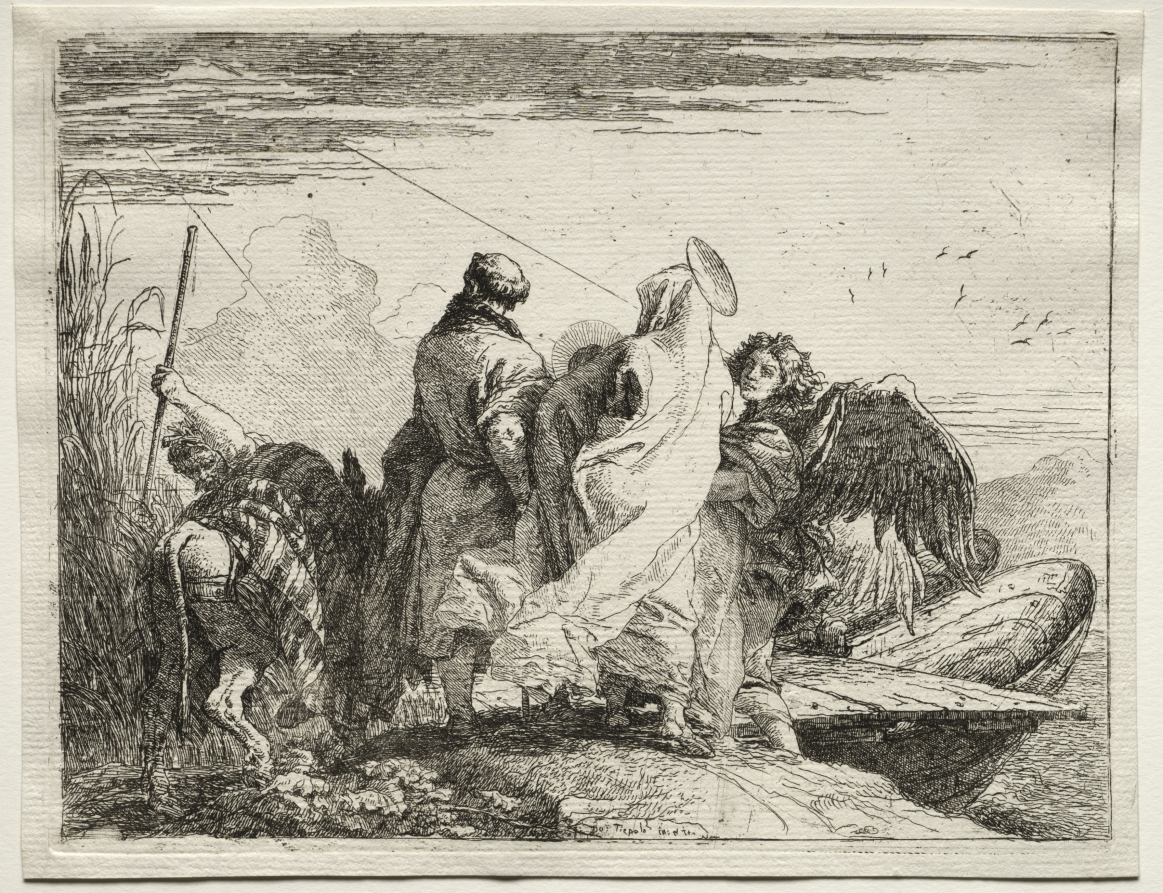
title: Flight into Egypt: The Holy Family Leaving the Shore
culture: Italy, 18th century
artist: Giovanni Domenico Tiepolo (Italian, 1727–1804)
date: 1750–53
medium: etching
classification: Print